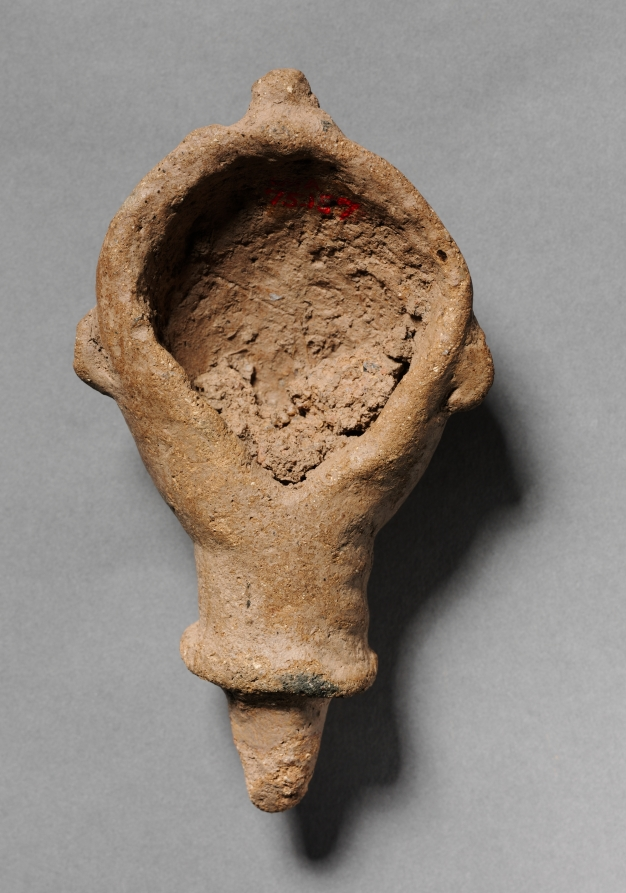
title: Head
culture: Africa, West Africa, Ghana, Akan-style artist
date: 1650–1700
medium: terracotta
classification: Sculpture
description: Akan sculptures made head forms as idealized portraits of the deceased. Made of terracotta, a low-termperature fired ceramic, this head features simple shapes of triangles, curves, and lozenges to represent the nose, mouth, and eyes. The style of this terracotta memorial head allows us to date it, and locate its likely place of manufacture. Scholars believe that this small, hollow-backed style sculpture is from the Ahinsan funerary site and was made between 1650 and 1700.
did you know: The projection below the neck would allow this head to function as a stopper for a vessel or as a way to affix it to the body of a statue.